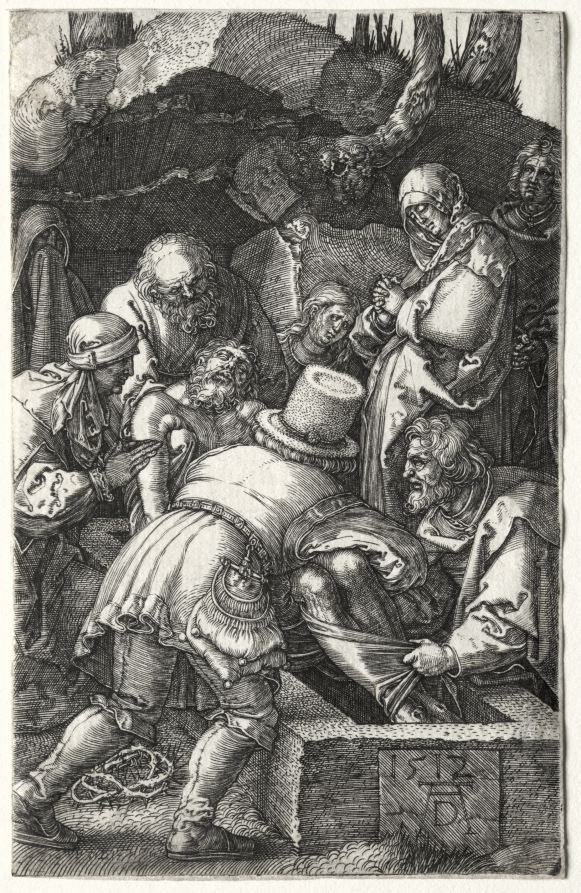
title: The Entombment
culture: Germany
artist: Albrecht Dürer (German, 1471–1528)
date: 1512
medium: engraving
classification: Print